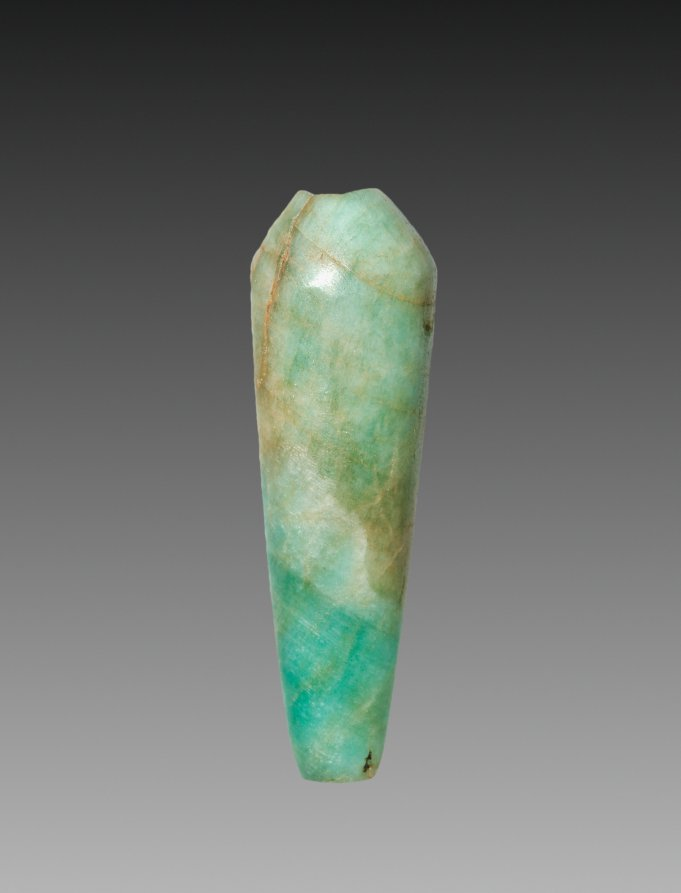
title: Teardrop-Shaped Bead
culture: Egypt, Middle Kingdom (2040–1648 BCE), Dynasty 12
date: 1980–1801 BCE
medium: feldspar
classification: Jewelry